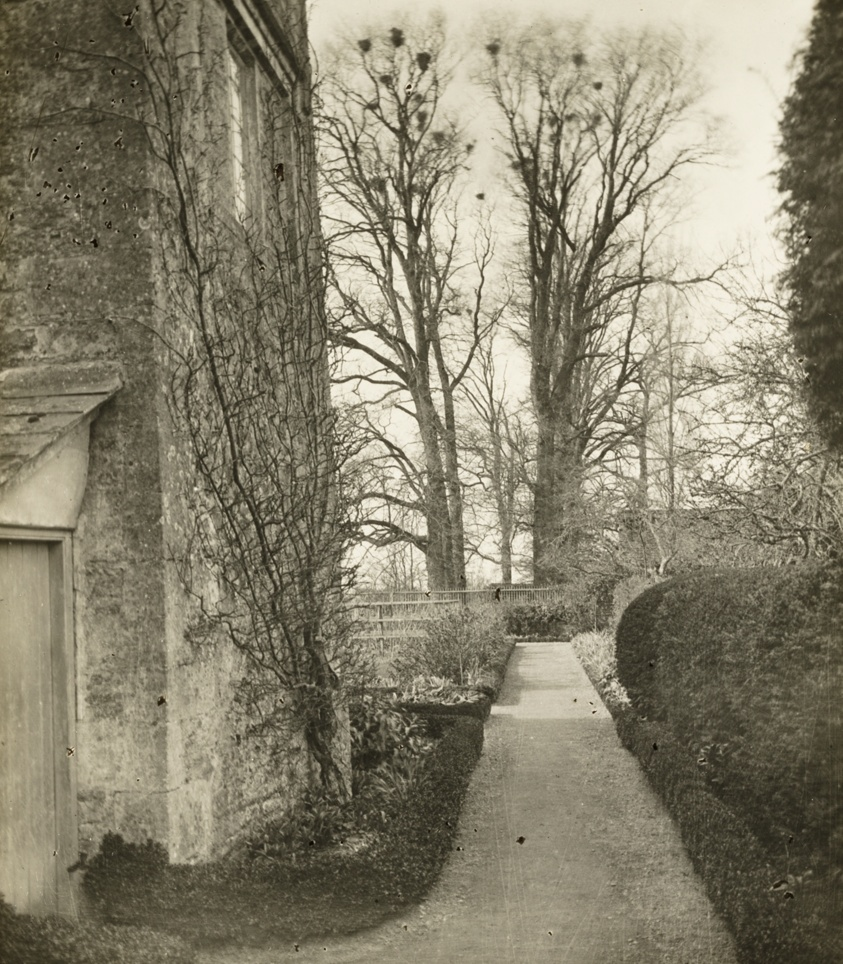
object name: Photograph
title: Kelmscott Manor: In the Garden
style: Pictorialism, 19th century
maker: Frederick H. Evans (English, 1853–1943)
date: 1896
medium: Lantern slide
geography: England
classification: photograph; photography